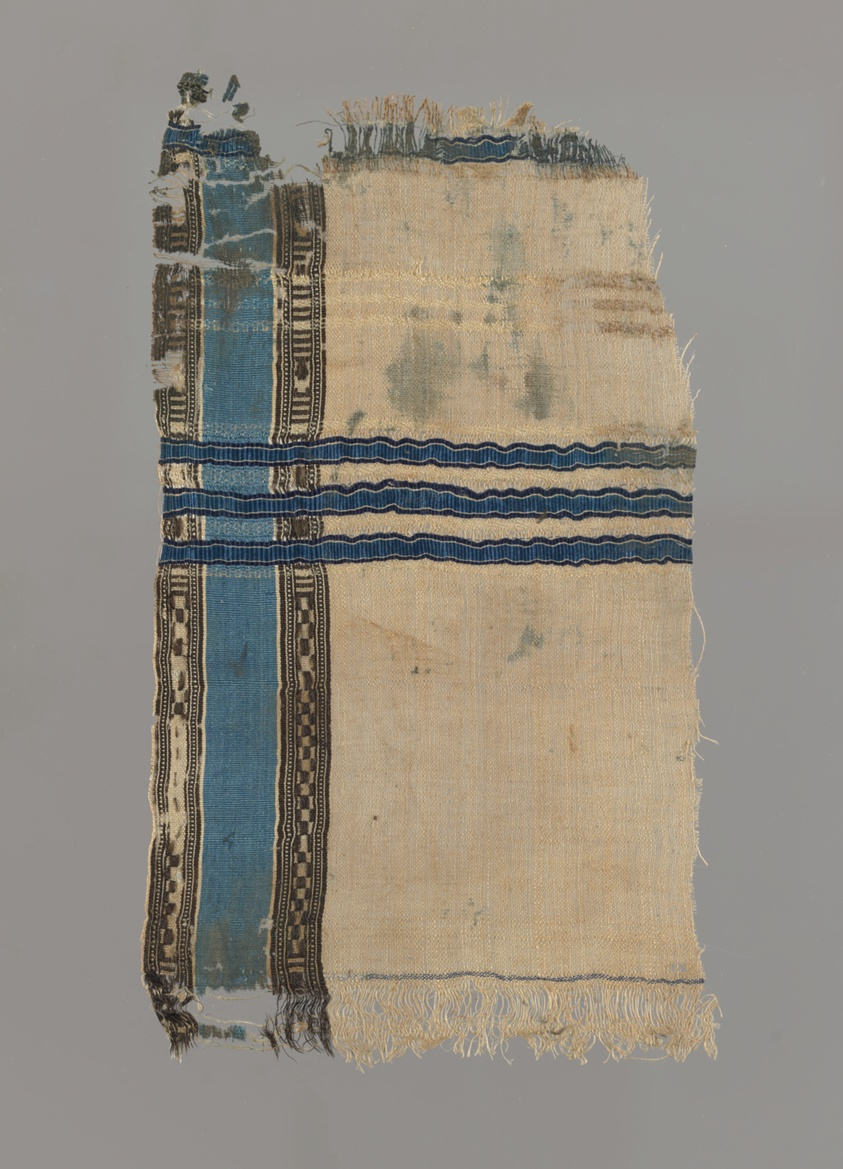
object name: Textile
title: Fragment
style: arabian, mamluk, ayyubid, fatimid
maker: Egypt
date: Arab period (641–969)/Fatimid period (969–1171)/Ayyubid period (1171–1250)/ Mamluk period (1250–1517), 9th/13th century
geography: Egypt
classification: textile; weaving